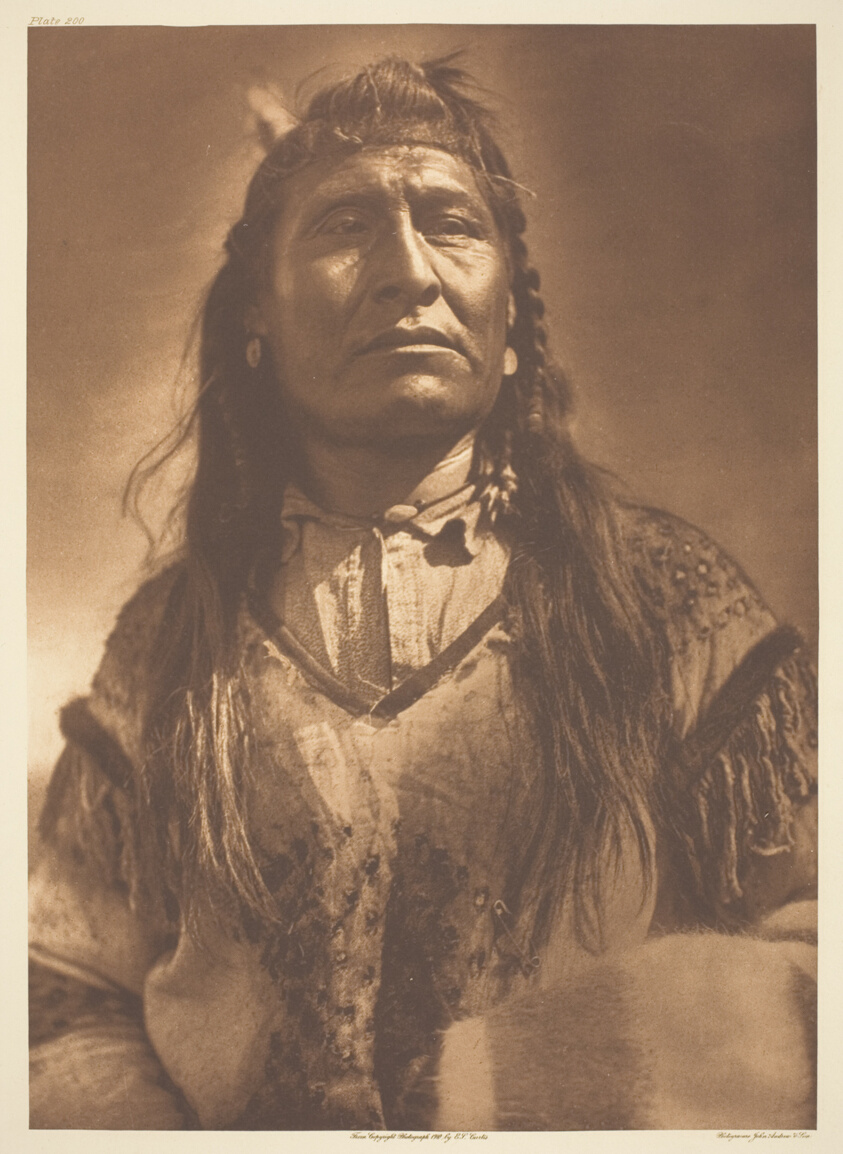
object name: Photograph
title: New Chest-Piegan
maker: Edward S. Curtis (American, 1868–1952)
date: 1910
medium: Photogravure, plate 200 from "The North American Indian, Volume 6" (1911)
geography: United States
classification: photogravure; photomechanical process; photography; photograph